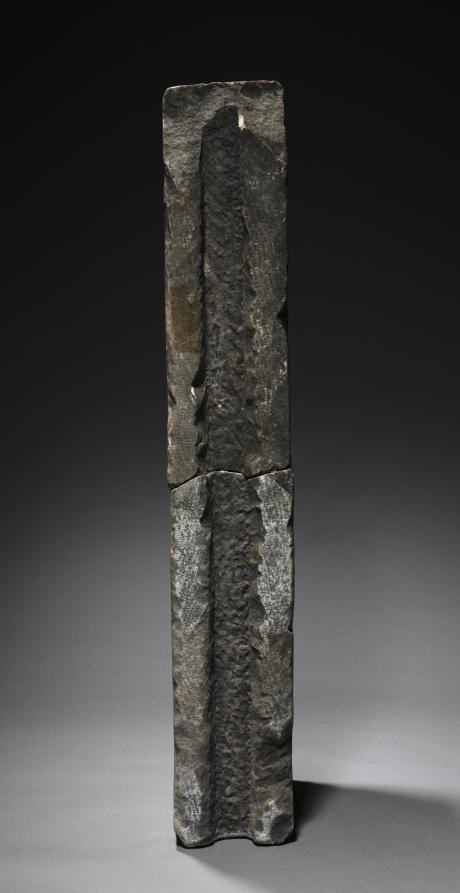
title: Transenna Post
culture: Lombardic, Italy, Rome, Migration period, 8th-9th Centuries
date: 700s-800s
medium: marble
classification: Sculpture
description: In Christian architecture a transenna is an openwork screen of stone or metal enclosing a shrine. These transenna elements were found in Rome; the posts were said to have been excavated on the Coelian Hill and may have originally formed part of the transenna of the Church of San Saba. The Lombards were an ancient Germanic-speaking tribe that settled in Italy after 568. Their artistic tradition was originally centered on small objects of personal adornment like buckles and brooches. After occupying Italy, the Lombards found themselves in contact with large-scale sculpture of classical and early Christian origin that, by the end of the 700s, they had learned to adopt and imitate, as seen here.